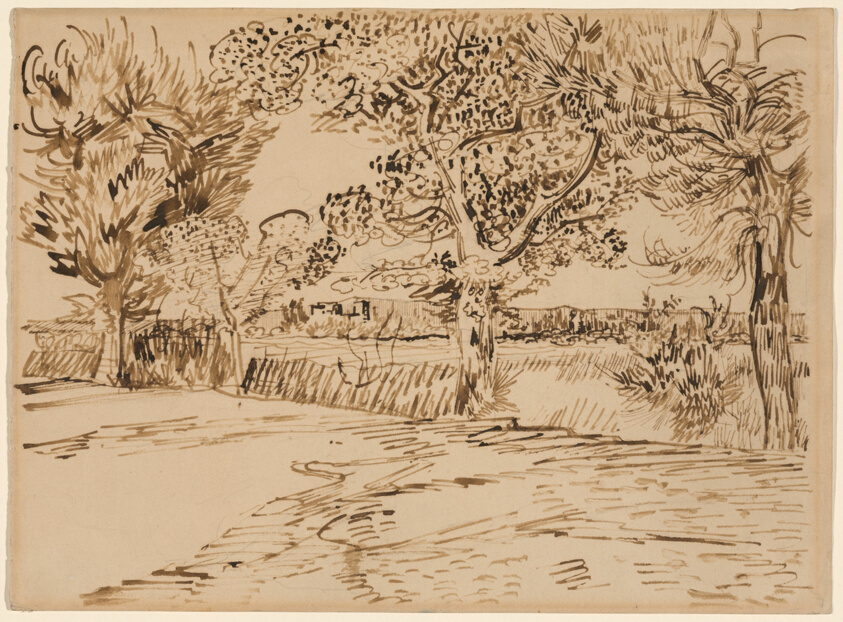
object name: Drawing and Watercolor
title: Landscape at Arles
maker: Vincent van Gogh (Dutch, 1853-1890)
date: July 1888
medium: Pen and brown ink over graphite on cream wove paper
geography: Netherlands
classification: watercolor; drawings (visual works); prints and drawing